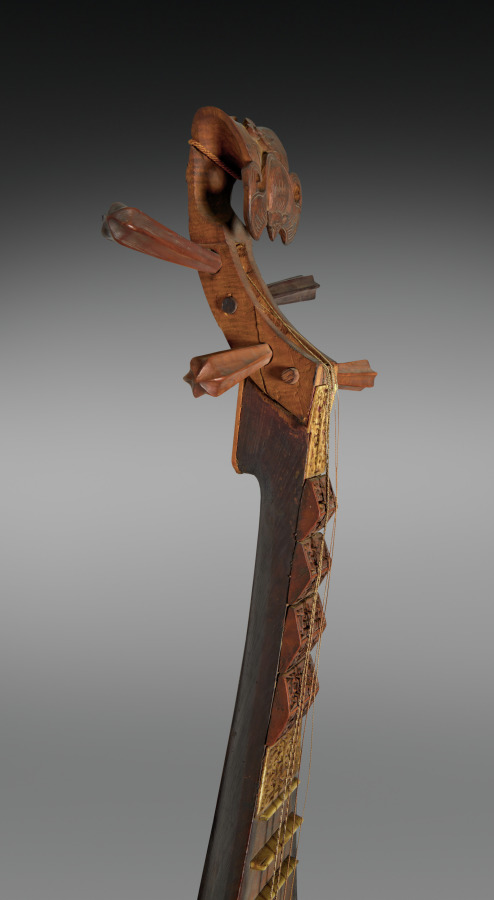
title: Pipa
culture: China, Qing dynasty (1644-1911)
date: 1800s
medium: Wood, ivory, bone, gut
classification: Musical Instrument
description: The term pipa, known since the 3rd century BC, describes the playing motion of the right hand: pi, “to play forward” (left), and pa, “to play backward” (right). A type of lute played with the fingers, it is used in opera and storytelling ensembles and has an impressive, virtuosic solo repertoire. Historic imagery, such as wall paintings, documents the spread of the pipa, along the Silk Road from western and central Asia to China. The bat finial here is a commonly used device on 19th-century Chinese lutes symbolizing good luck.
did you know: The string holder is made of bone.